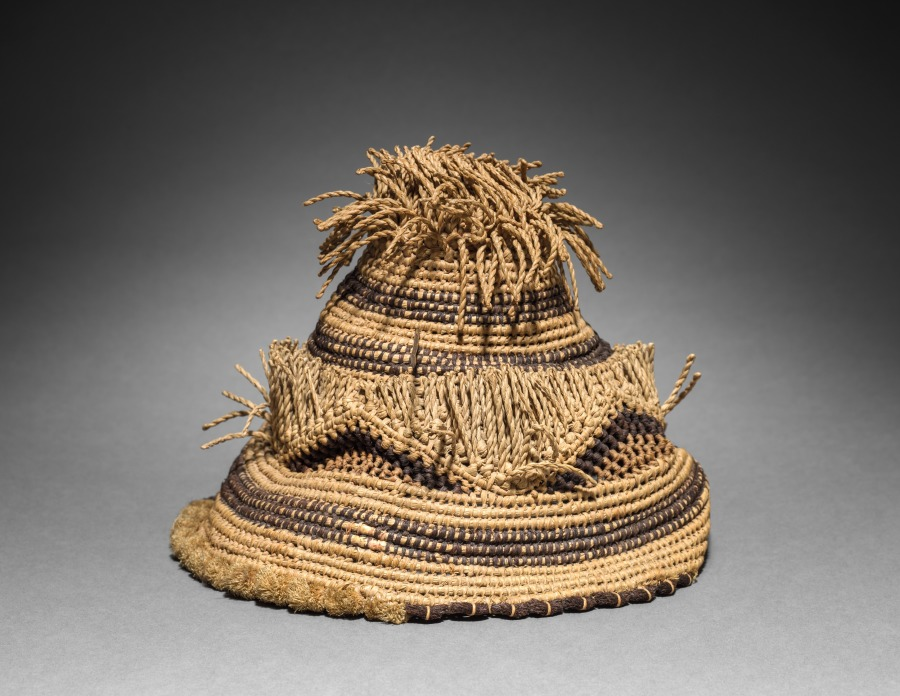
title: Hat (laket mishiing) with Pin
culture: Africa, Central Africa, Democratic Republic of Congo, early 20th century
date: early 1900s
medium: Raffia, metal, and dye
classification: Garment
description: Titled Kuba men and prominent women wear the laket, a small ornate dome-shaped hat. An essential fashion item of adult men in good social standing, it focuses special attention on the head as a significant marker of individual identity, ethnic affiliation, status, and role in society. This prestige object is secured on the crown of the head with a nine-and-a-half-inch metal pin that pierces through the hat onto a clump of hair. The laket is made from raffia palm fiber coiled into threads and woven in two alternating patterns and contrasting light and dark (dyed) wefts. There are two examples of the laket: the plain type with the flat top, and the more elaborate type called the laket mishiing.